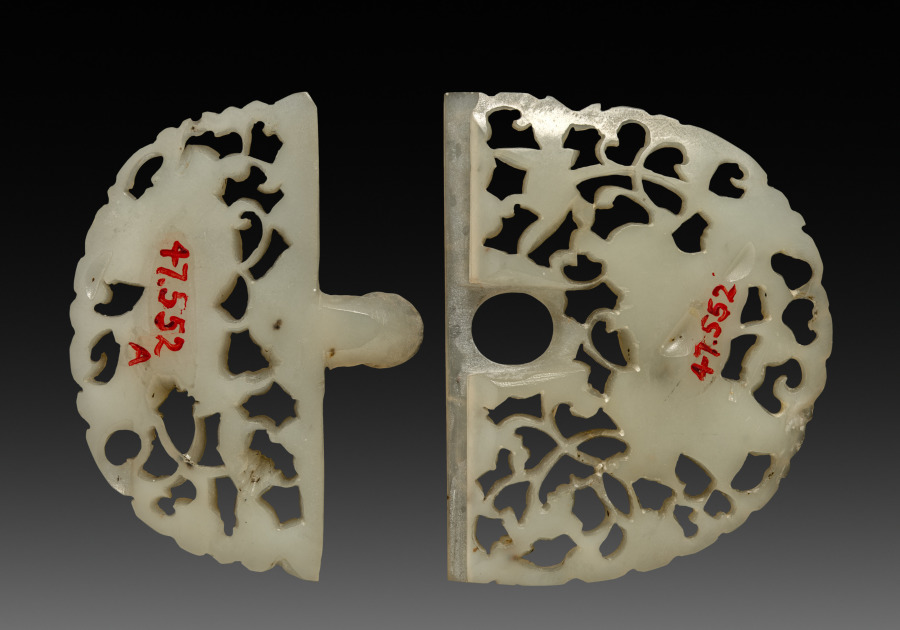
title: Buckle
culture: China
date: 1800s–1900s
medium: white jade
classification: Jewelry